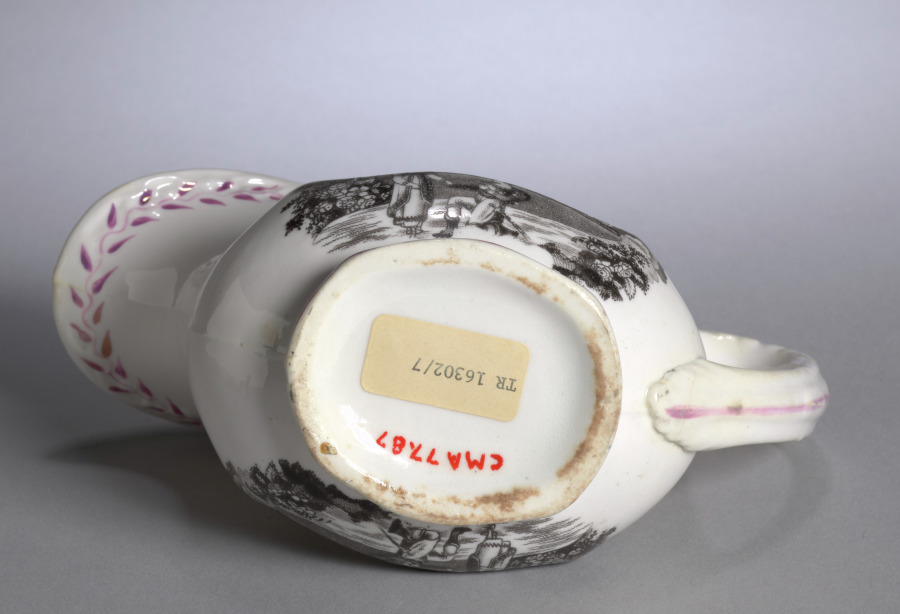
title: Cream Pitcher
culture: England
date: c. 1800–1825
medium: earthenware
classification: Ceramic